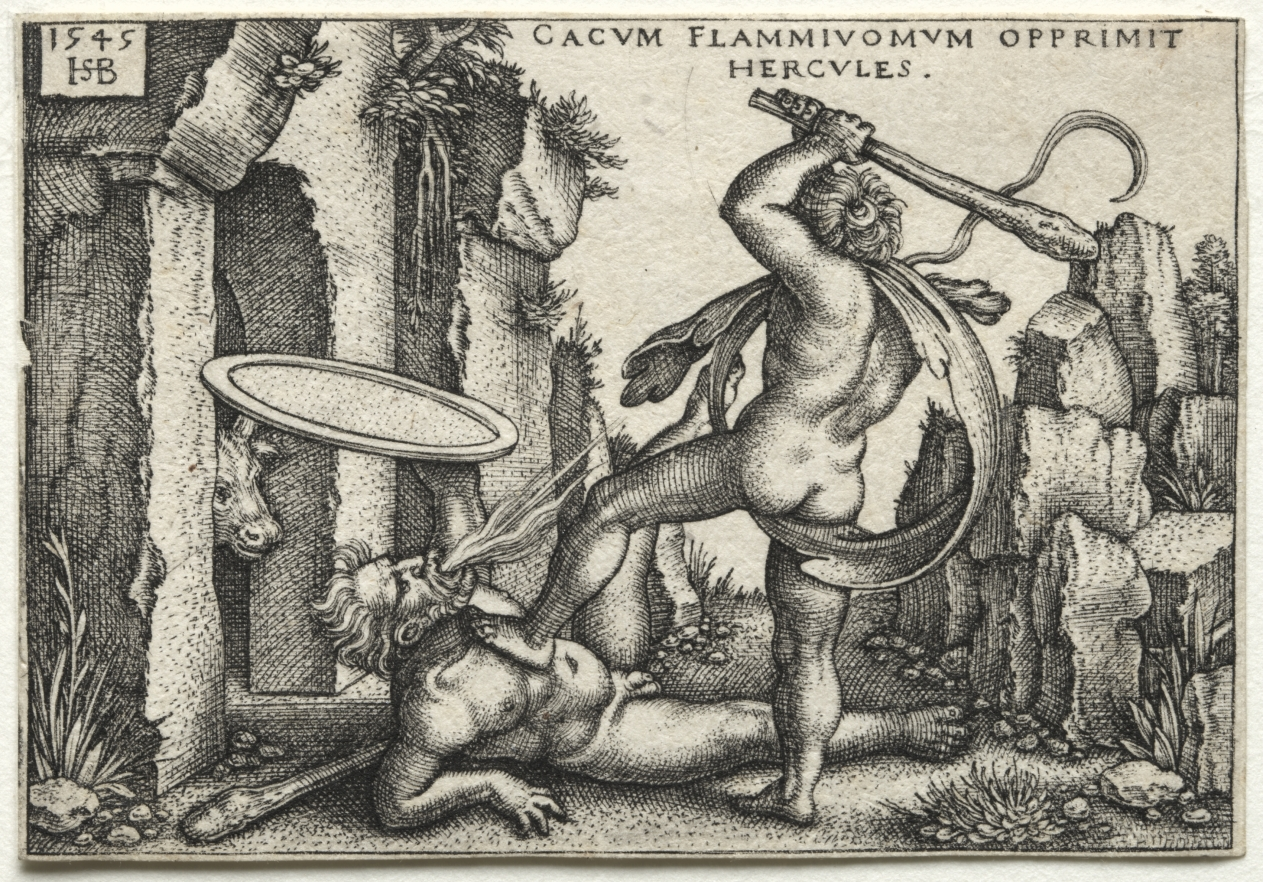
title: The Labors of Hercules: Hercules Killing the Giant Cacus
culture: Germany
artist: Hans Sebald Beham (German, 1500–1550)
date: 1545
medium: engraving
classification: Print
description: While Hercules was asleep, the fire-breathing giant Cacus stole some oxen that Hercules had been herding. Hercules tracked the animals to Cacus’s lair, where he slew the giant. Here, an ox watches as Cacus spews a blast of fire, and Hercules prepares to strike a fatal blow. Beham was one of several German printmakers referred to today as the “Little Masters.” They established their artistic prowess by engraving remarkably small prints, appealing to collectors fascinated with miniature objects and curiosities.